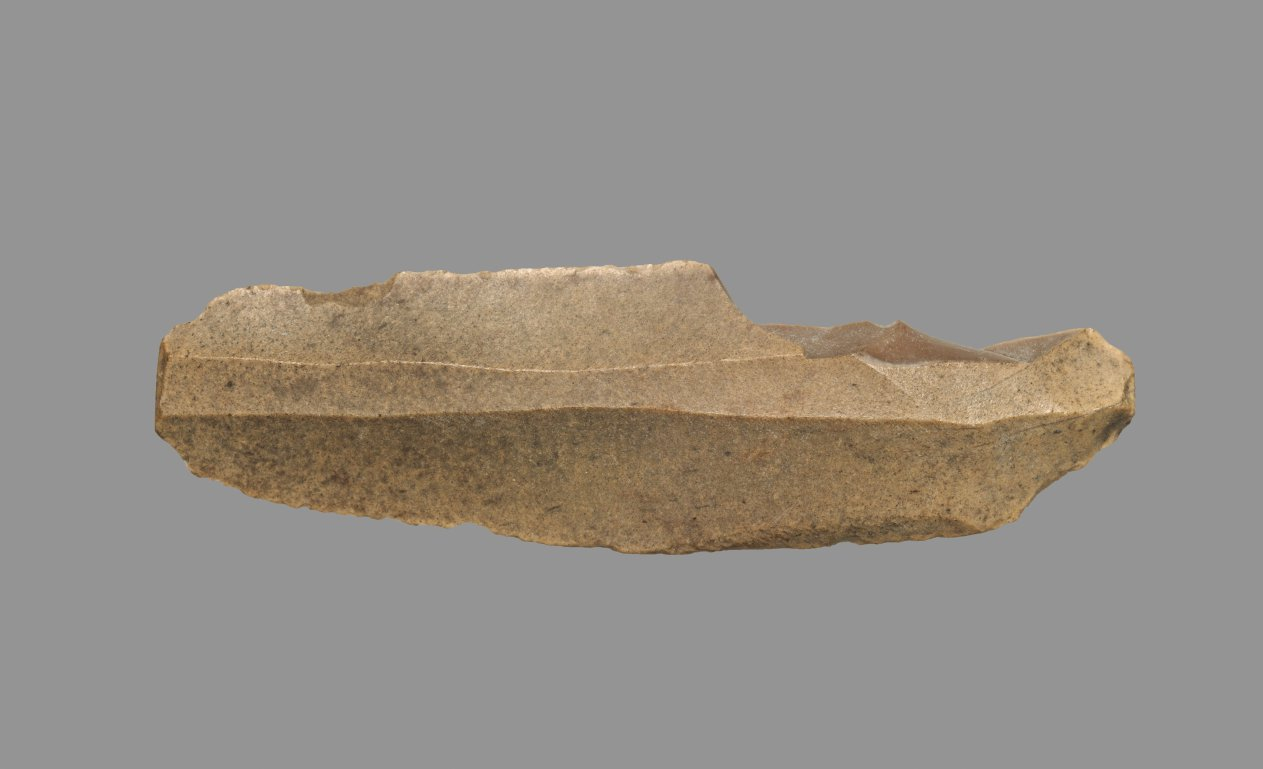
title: Sickle Blade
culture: Egypt, Middle Kingdom (2040–1648 BCE), Dynasty 12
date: 1980–1801 BCE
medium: flint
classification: Implements